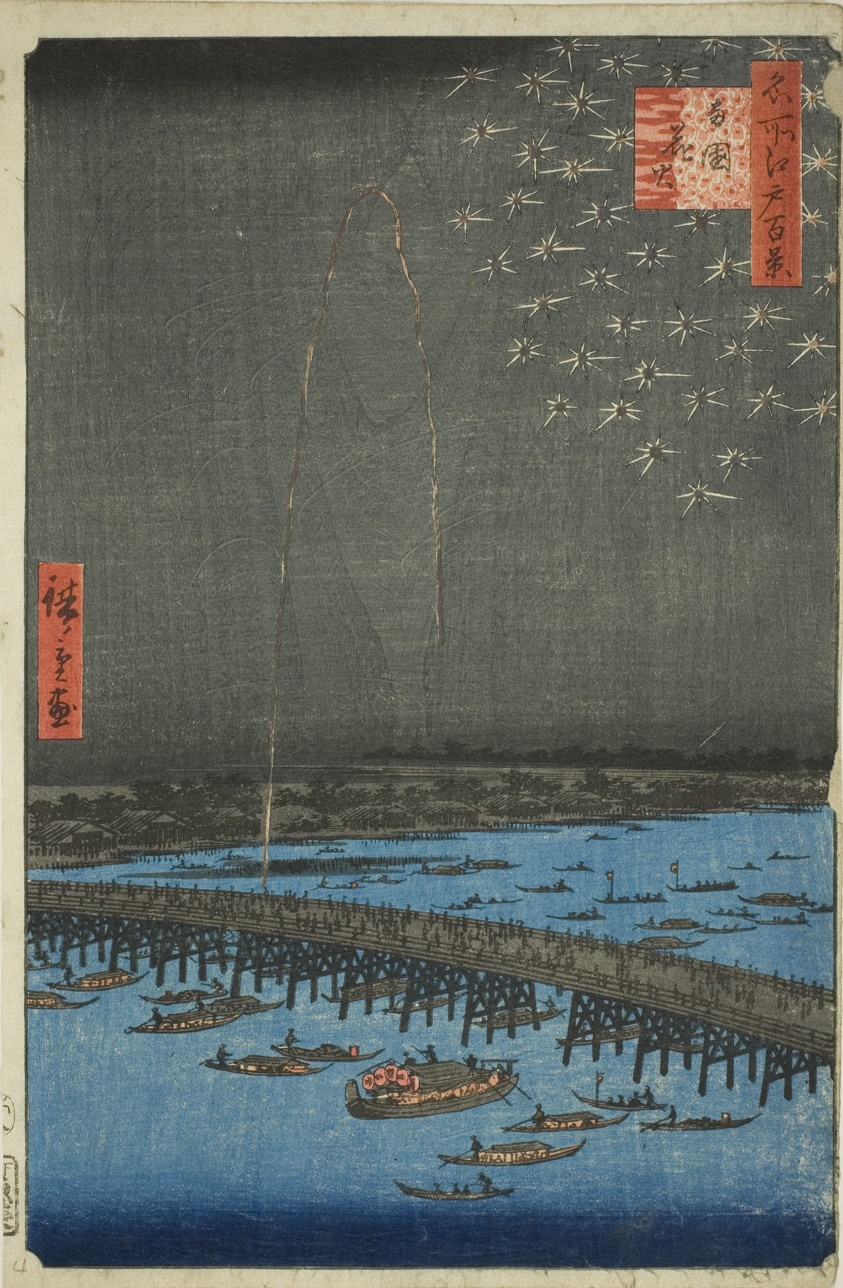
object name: Print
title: Fireworks at Ryogoku (Ryogoku hanabi), from the series "One Hundred Famous Views of Edo (Meisho Edo hyakkei)"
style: Japanese (culture or style)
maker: Utagawa Hiroshige 歌川 広重; Japanese, 1797-1858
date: 1858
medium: Color woodblock print; oban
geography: Japan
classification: woodblock print; print; asian art